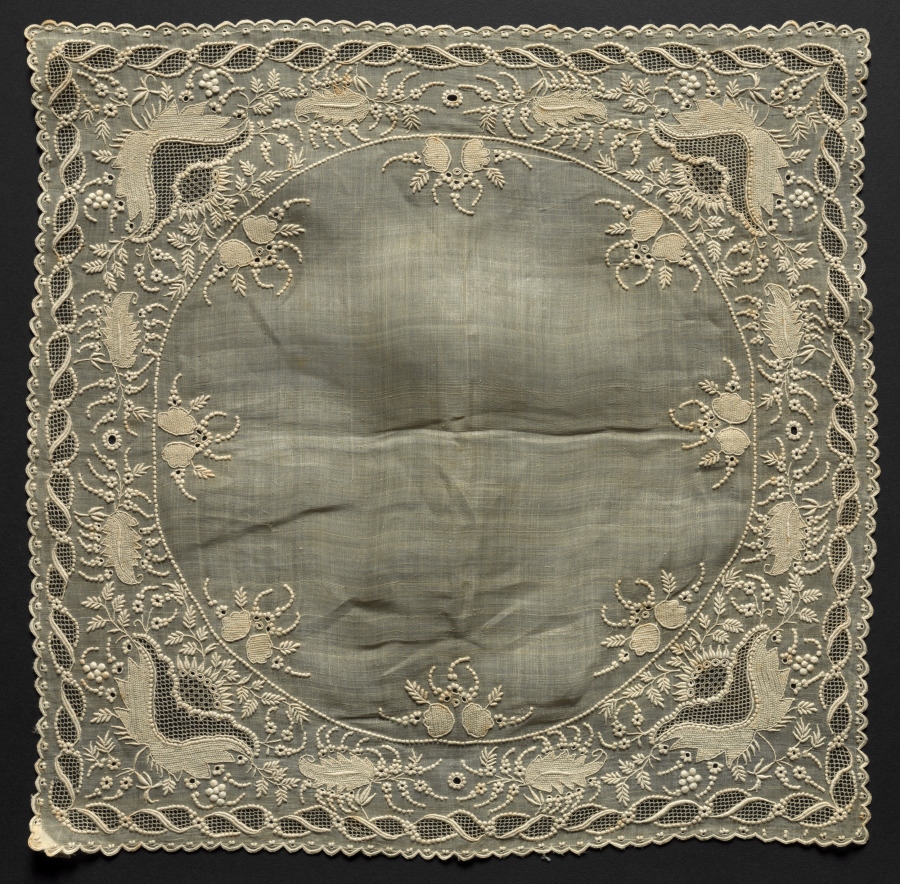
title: Handkerchief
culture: Madeira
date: 1800s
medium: Plain weave cotton (est.): needle lace (drawnwork) and linen embroidery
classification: Embroidery